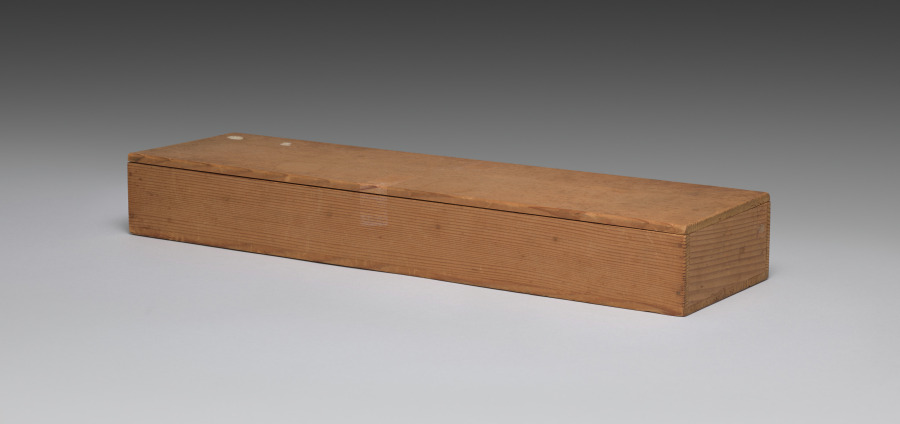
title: Saucers with Matching Shells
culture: Japan, Meiji period (1868–1912)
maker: Seifū Yohei III (Japanese, 1851–1914)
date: 1893–1914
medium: Set of five saucers; porcelain with molded designs and green crackled glaze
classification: Ceramic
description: Yohei III’s main output for his sophisticated clientele was in the form of tea sets and dining sets. He created a range of dishes in green glazes. He often produced in pairs, sets of five, or sets of ten. The set of five dishes with a more complex form is described as having a “water-colored glaze” (mizuiroyū). These are shaped like clam half shells, a reference to a game in which shell halves painted with narrative scenes or a variety of motifs must be matched back together by the players. The dishes have molded details to articulate the shell forms, and the crackling across each shell adds another dimension to the surface. Each dish is set on three small feet, formed by a pinched piece of clay and attached to an unglazed area on the underside of the dish. Curiously, while four of the dishes are stamped with the artist’s mark, one has instead a signature carved into the base.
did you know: The saucers are meant to look like matched halves of clam shells in reference to a once popular game.